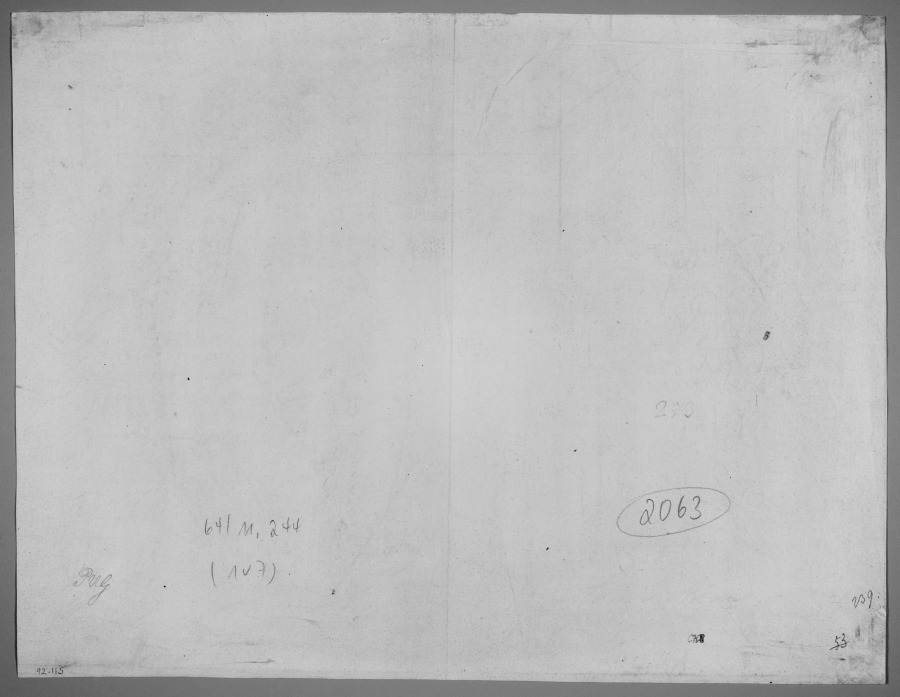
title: The Parable of the Tribute Money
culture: Netherlands, late 16th Century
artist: Master of the Egmont Albums (Netherlandish, 1480-1620)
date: c. 1580–1600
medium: Pen and brown ink, traces of pen and black ink and black chalk, on paper; framing lines in brown ink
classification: Drawing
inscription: falsely signed, lower right, in brown ink: Hans van Aken fecit. [abraded, visible under UV] ; VERSO, right center, in graphite: 259 ; lower left, in graphite: 641 M. 244 / (1V7) ; lower left, in graphite: PMG ; lower right, in graphite: 2063 [circled] ; lower right, in graphite: [illegible] [partially erased] ; lower right, in graphite: [illegible] [partially erased] ; lower right, in graphite: 239. ; lower right, in graphite: 53 [crossed out]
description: The New Testament parable of the tribute money addresses the division between worldly and divine power. Here, the artist depicted Christ in the center of a civic square with one hand pointing toward a king wearing a crown and an ermine robe and the other toward God above. Encouraged by Christ’s words to show each authority its due, the crowd shows deference to both the king and God via facial expression, pose, and gesture. Parables were enduringly popular on prints, stained glass, and decorative objects for their relevance to the issues and choices made by everyday citizens.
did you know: The pose of the kneeling man and the decoration of the door surround in this drawing are both based on details in a woodcut made earlier in the century by the German artist Albrecht Dürer.